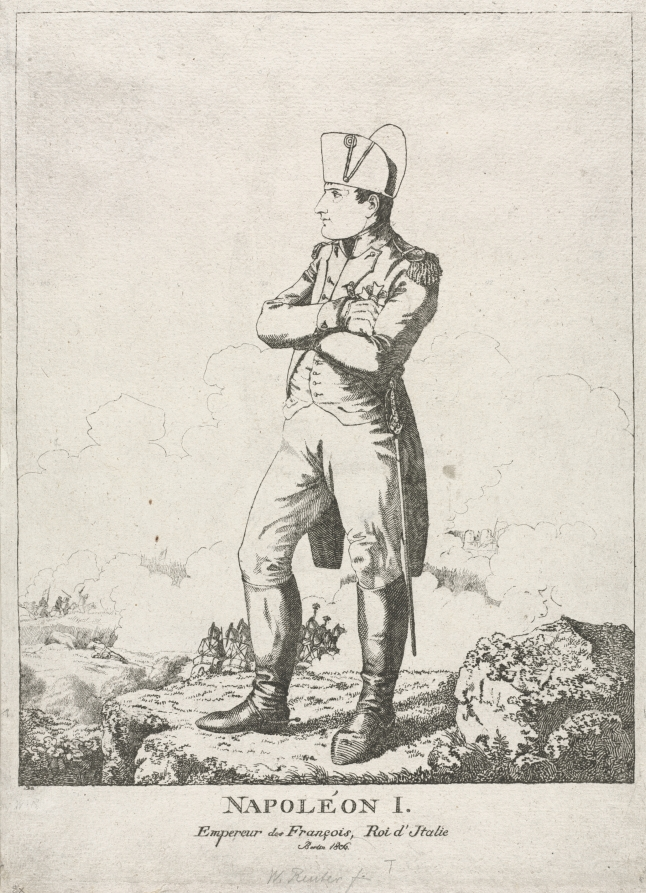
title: Napoleon I, Emperor of France, King of Italy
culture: Germany, 19th century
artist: Friedrich Wilhelm Reuter (German, 1768–1834)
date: 1806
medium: lithograph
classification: Print